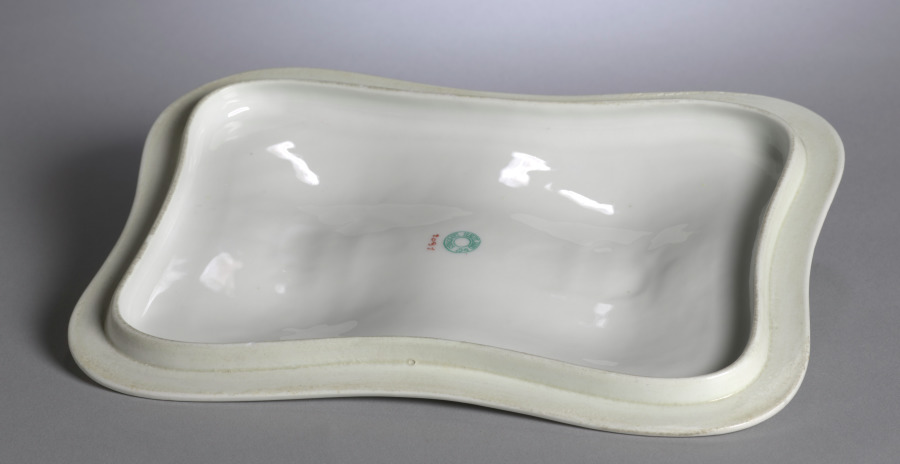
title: Cover for a Vegetable Bowl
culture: France, Limoges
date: c. 1890–1910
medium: porcelain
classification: Ceramic